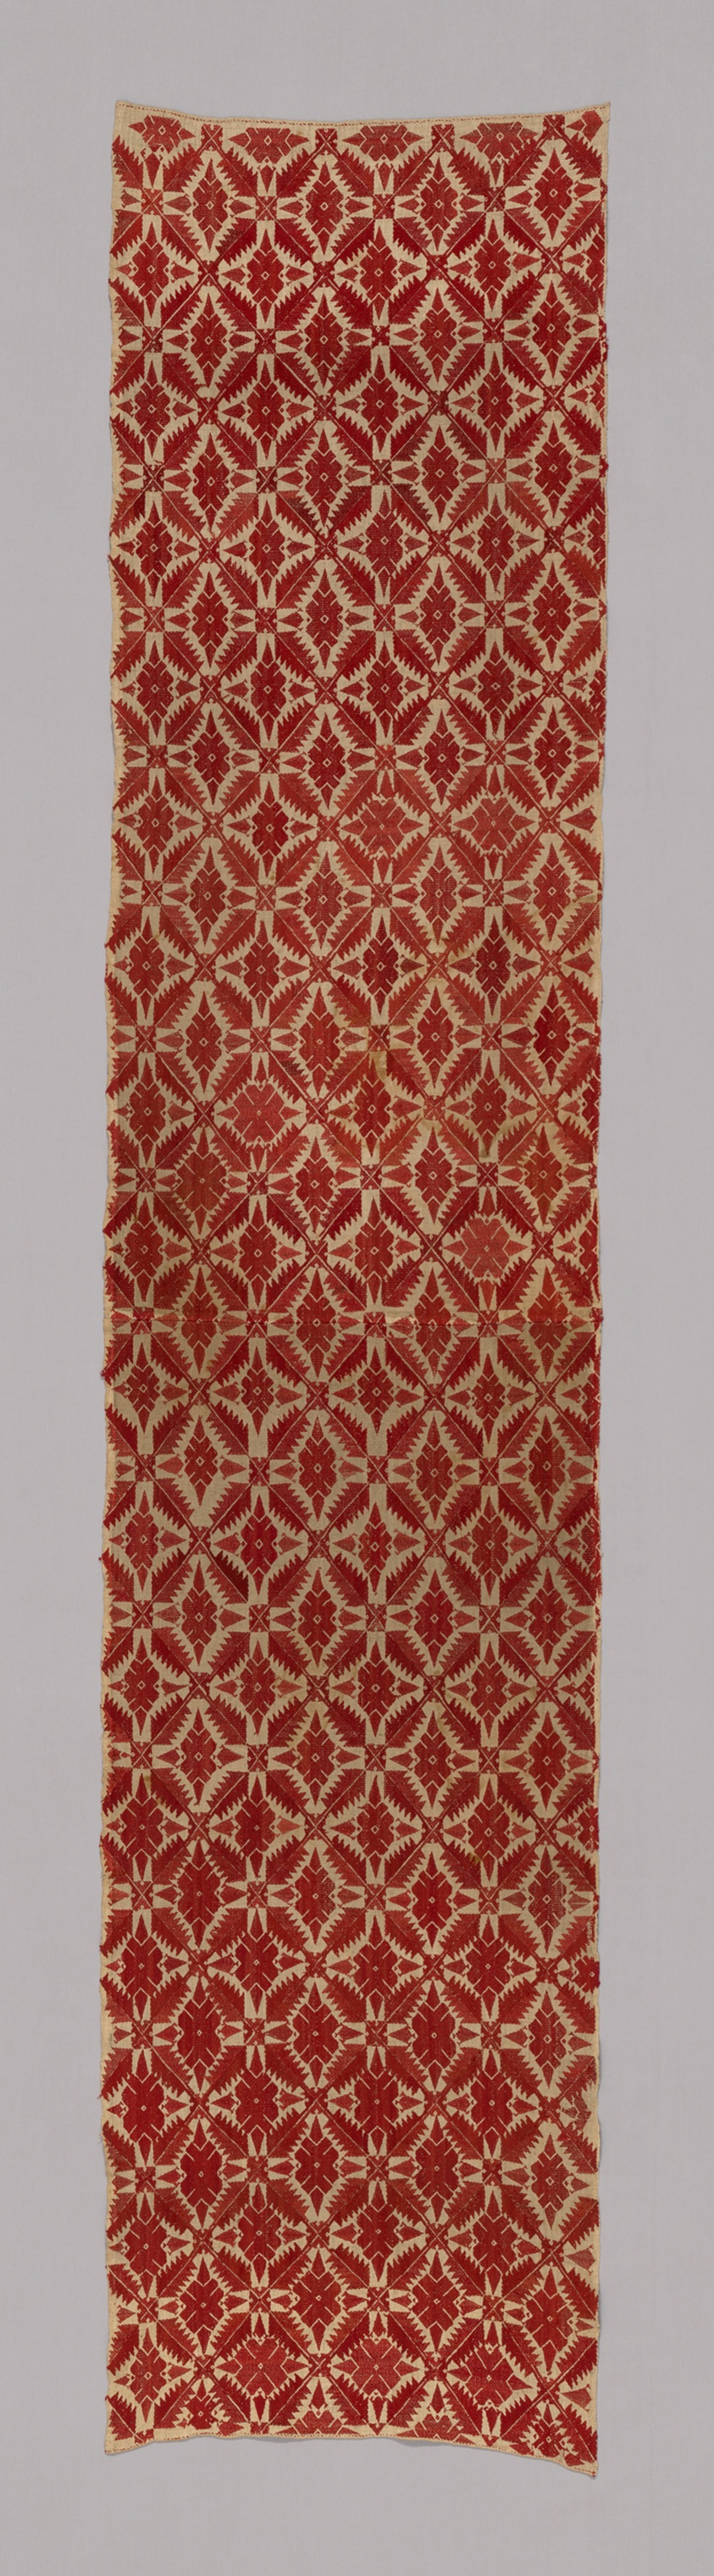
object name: Textile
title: Panel (Bedcover?)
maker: Greece, Cyclades Islands, Naxos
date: 18th century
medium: Linen, plain weave; embroidered with silk in running stitches (pattern darning); two panels joined in weft direction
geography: Náxos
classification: textile; needlework (visual works)